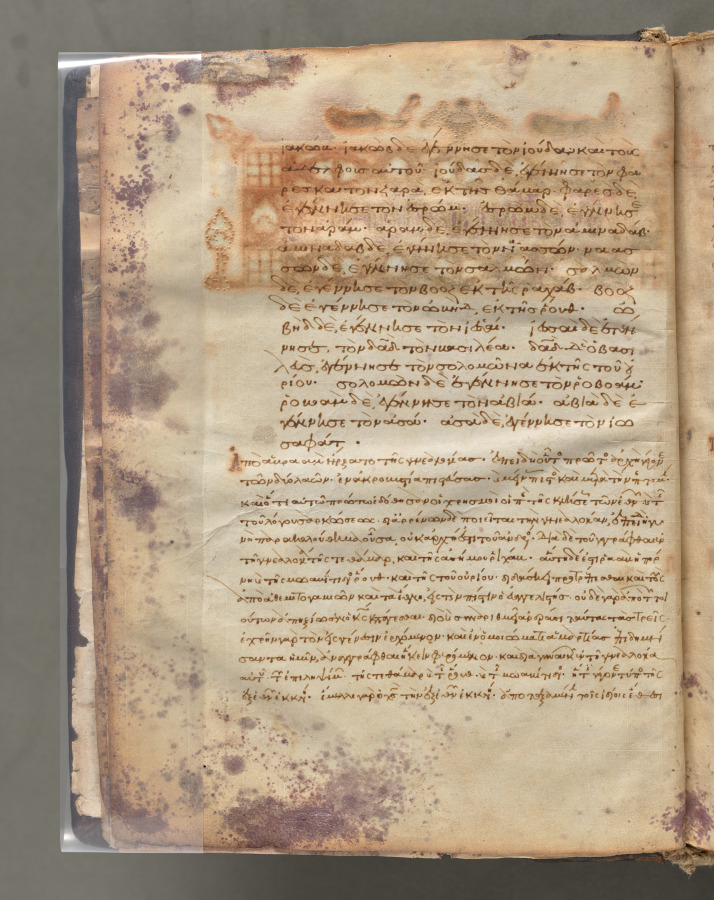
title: Text, folio 6 (verso), from a Gospel Book with Commentaries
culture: Byzantium, Constantinople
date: c. 1000–1100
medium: ink, tempera, and gold on vellum; leather binding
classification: Bound Volume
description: Each of the four gospels in this book opens on a page with brilliantly illuminated borders depicting the author of the text as well as birds-principally peacocks, symbols of the immortality of the soul-and fountains, representing the fountain of life and the salvation of the soul. This volume consists of 428 leaves with texts in Greek. Its level of sophistication suggests that it was probably written and decorated in a monastery in Constantinople.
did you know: Gospel Books were carried in procession through Byzantine churches.